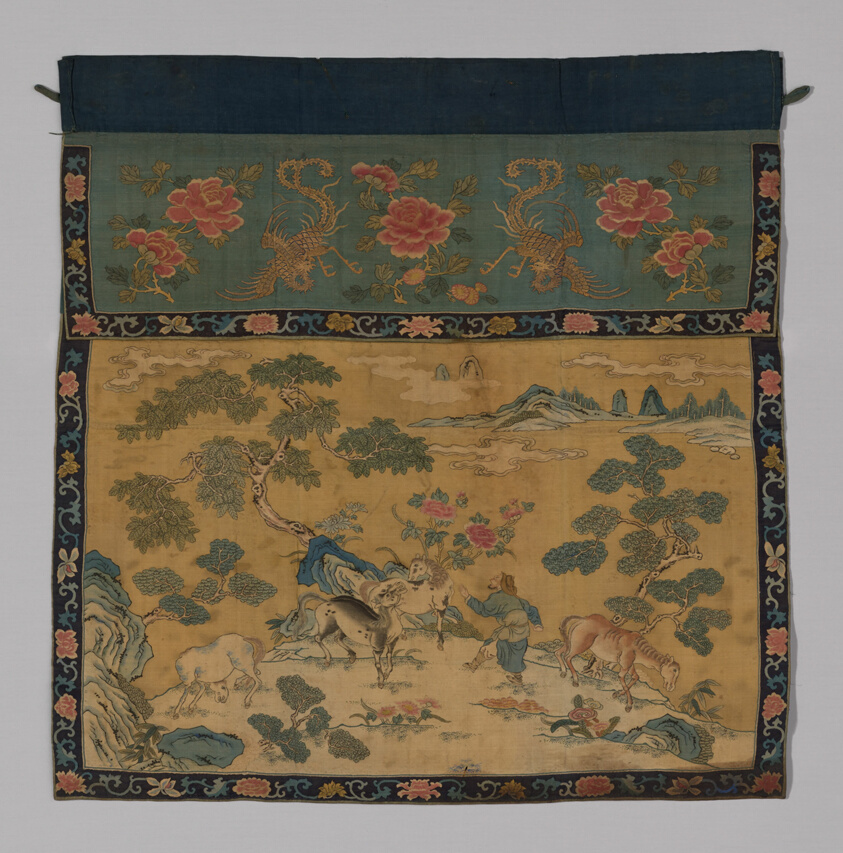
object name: Textile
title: Table Frontal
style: qing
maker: China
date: Qing dynasty(1644–1911), 1775–1825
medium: Landscape design with figures and horses.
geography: China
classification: textile; weaving